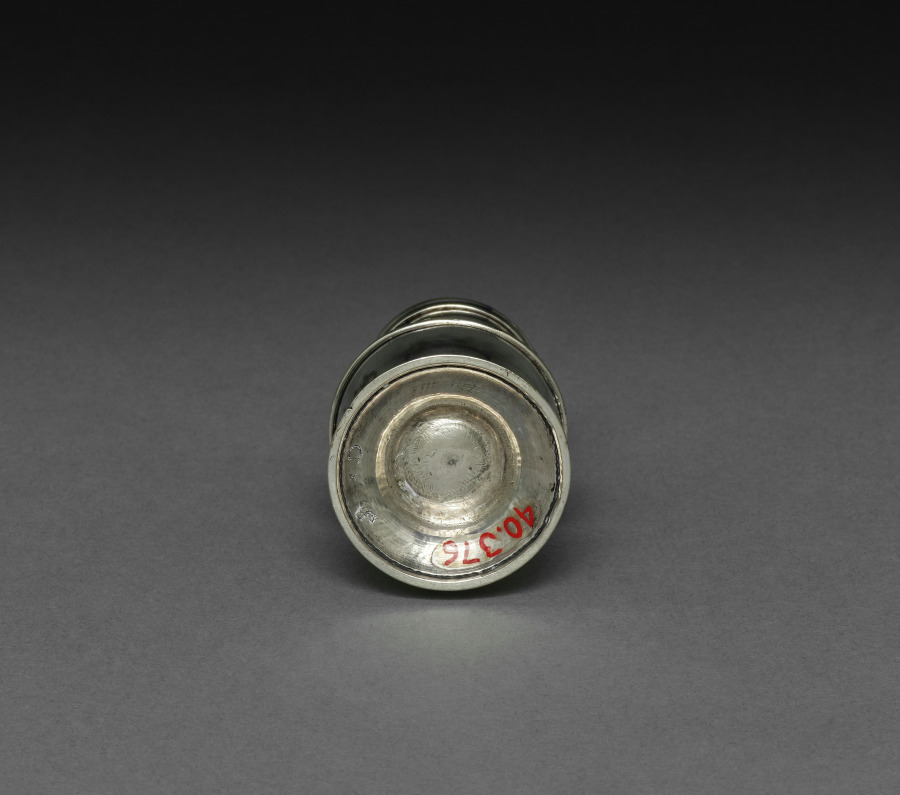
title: Caster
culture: America, Massachusetts, Salem, 18th century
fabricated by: John Andrew (American, 1747–1791)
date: c. 1770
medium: silver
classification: Silver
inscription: Engraved underside of base: "C * S"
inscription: Stamped on side of vessel: "Andrew"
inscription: Scratched underside of base: "3-10"